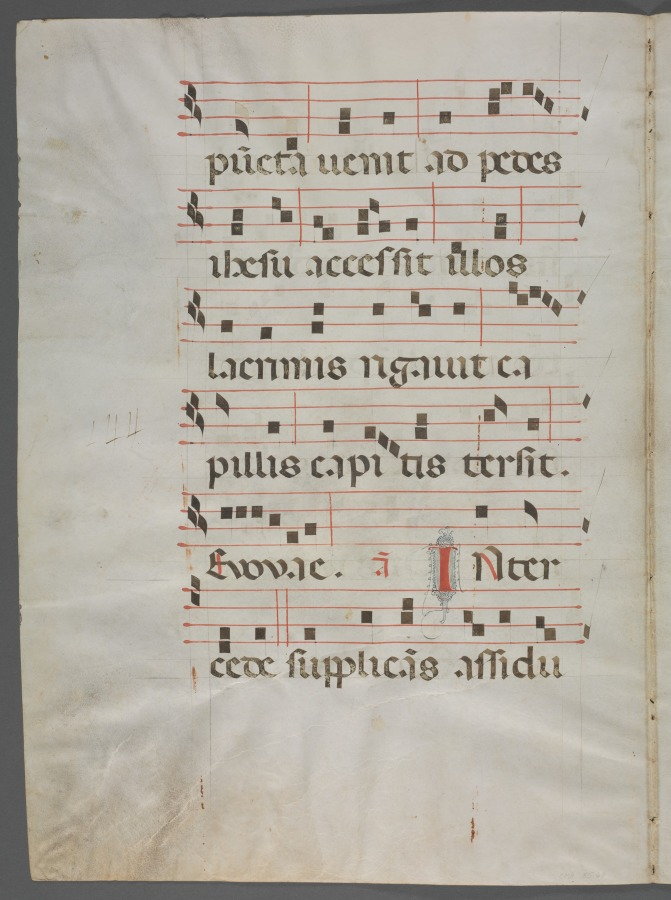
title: Bifolium from an Antiphonary: Music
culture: Italy, Bologna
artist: Primo Miniatore di San Domenico (Italian)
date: c. 1320–40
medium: ink, tempera, and gold on parchment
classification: Manuscript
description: The representation of Saint Dominic (1170–1221), founder of the Dominican Order of Preachers, in this initial suggests that this double page was at one time part of a manuscript made for a Dominican convent. Saint Dominic traveled much, preaching throughout Europe, and was particularly venerated in Bologna, the city in which he died and was buried. The illuminator of this initial is named after a volume he decorated of Seneca’s works (now in the Bibliothèque nationale in Paris). His workshop specialized in large-scale manuscripts destined for wealthy religious institutions in the region of Emilia, for which Bologna was the artistic and intellectual center.